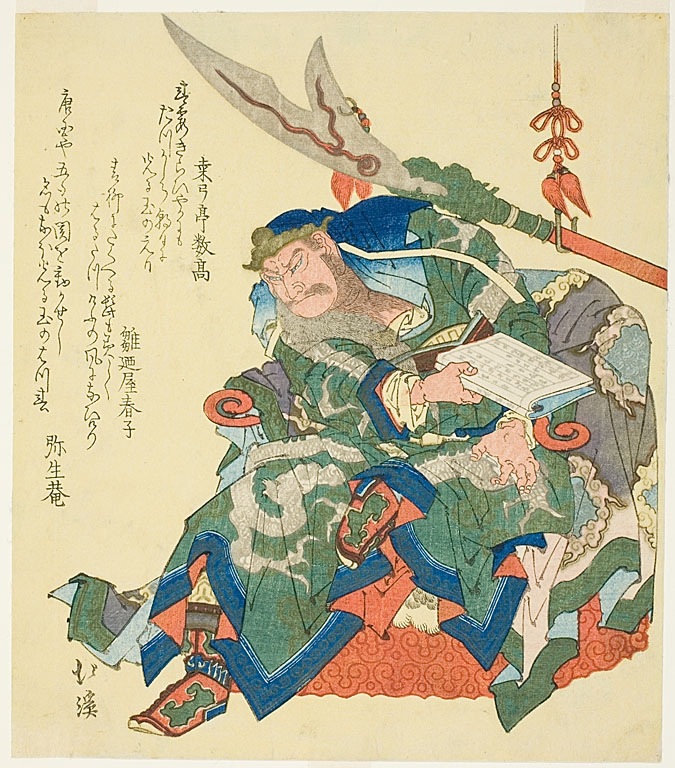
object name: Print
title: Seated Guanyu Reading the Book of Chunqiu by Zuo Qiuming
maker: Totoya Hokkei (Japanese, 1780-1850)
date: 1820s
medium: Color woodblock print; surimono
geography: Japan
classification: woodblock print; print; asian art